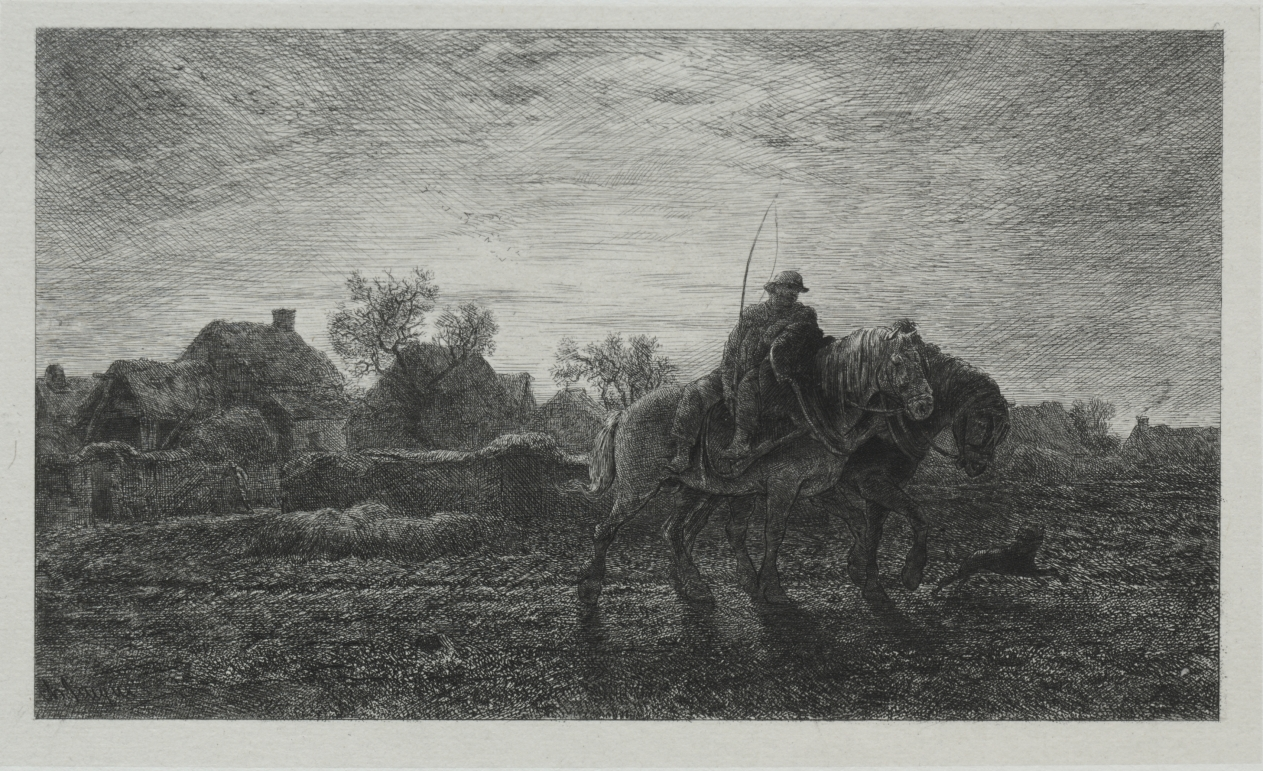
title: The Morning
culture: France, 19th century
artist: Charles-Émile Jacque (French, 1813–1894)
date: 1864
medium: etching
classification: Print